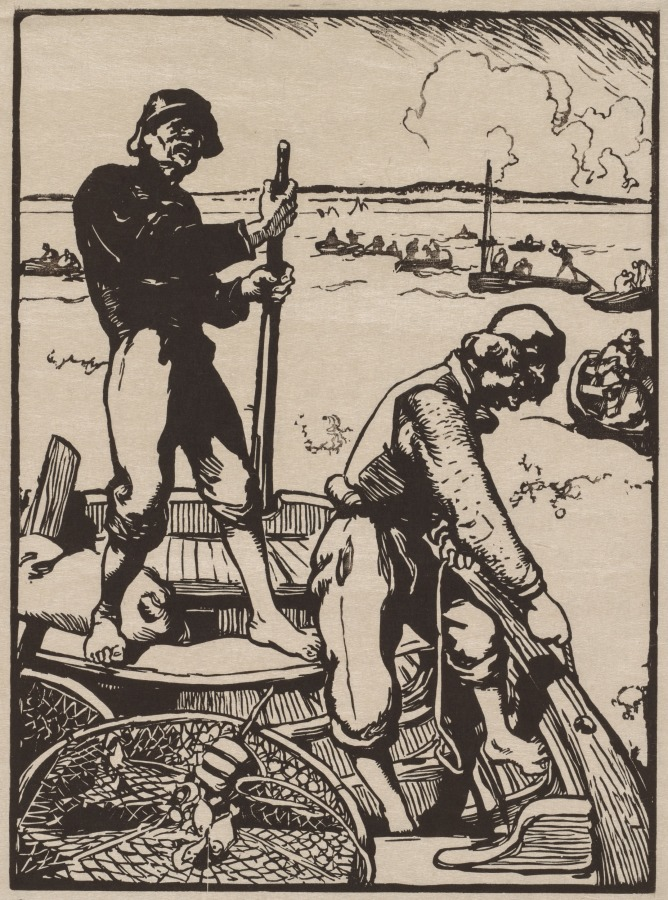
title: Shrimp Fishermen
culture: France, 19th-20th century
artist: Auguste Louis Lepère (French, 1849–1918)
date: 1895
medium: woodcut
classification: Print